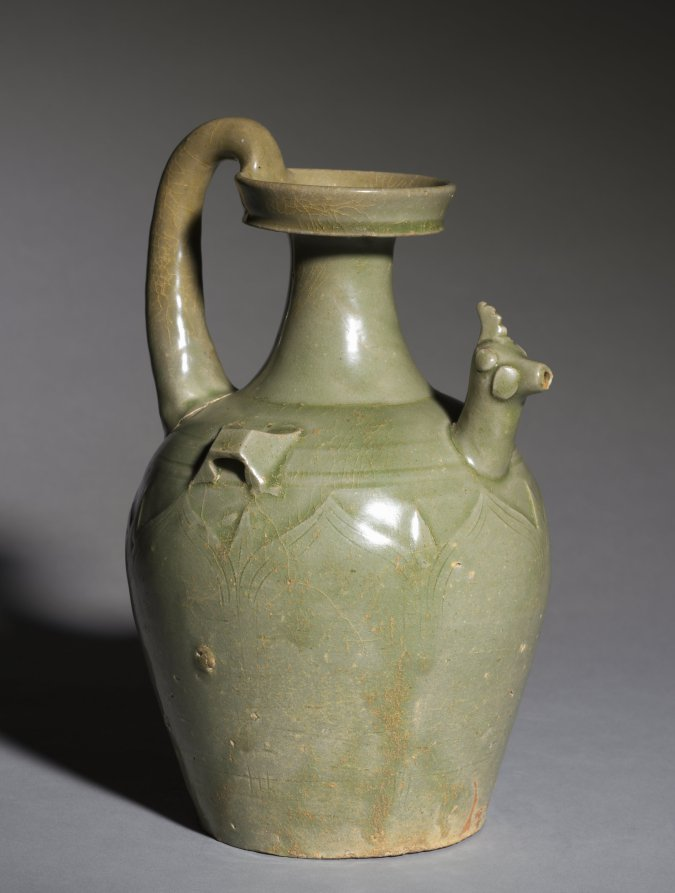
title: Chicken-Headed Ewer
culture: China, Zhejiang province, Southern Dynasties period (420-589)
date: 220–589 CE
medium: green-glazed stoneware with incised, carved and applied decoration, Yue ware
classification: Ceramic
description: The development of high-fired celadon in the south was a significant achievement in Chinese ceramics history. The ewer's shape was indigenous and appeared to have been transformed from the hu (jar) attached with a small chicken head. Whereas the early chicken-headed ewers have a wide, stout body, this example represents a further development toward more elongated proportions, adding the decoration of carved lotus petals.